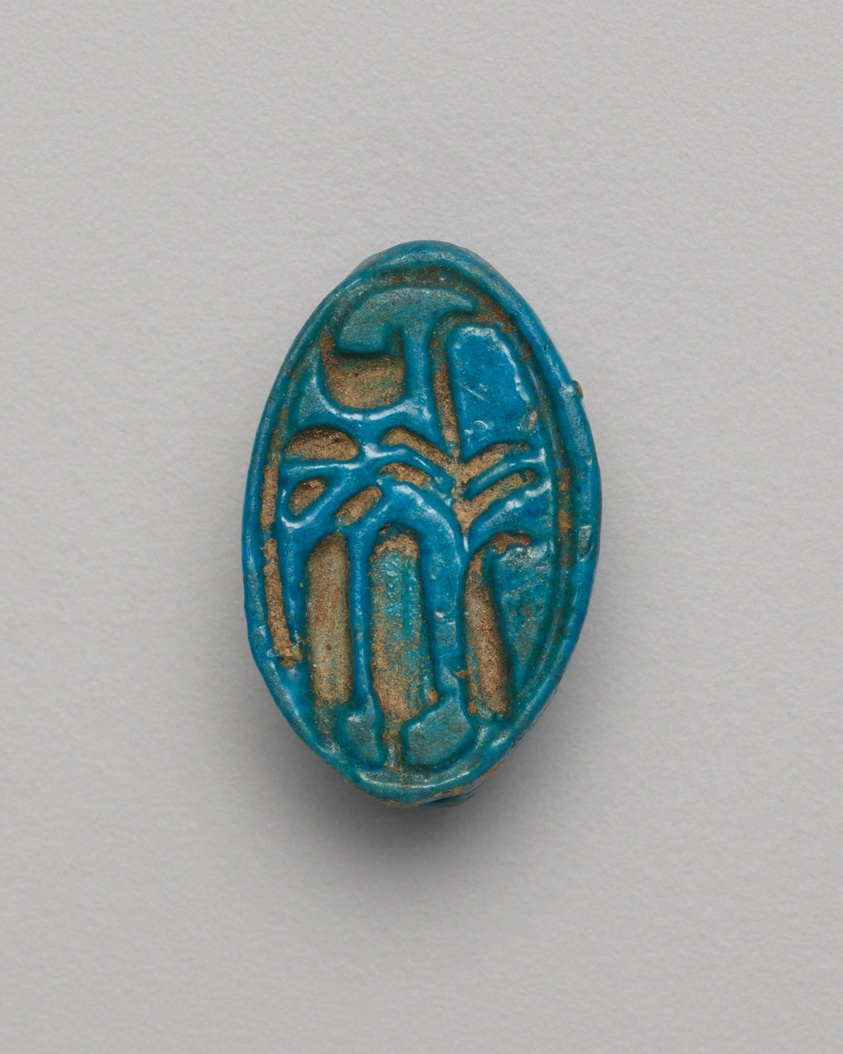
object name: Costume and Accessories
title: Cowroid: The King’s Wife, Tiye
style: new kingdom, ancient, eighteenth dynasty, egyptian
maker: Egyptian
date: New Kingdom, Dynasty 18, reign of Amenhotep III (about 1390–1352 BCE)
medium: Faience or steatite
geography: Egypt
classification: scaraboids; jewelry; amulet; ancient art; costume; faïence (composite material)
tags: Hieroglyphs, queens